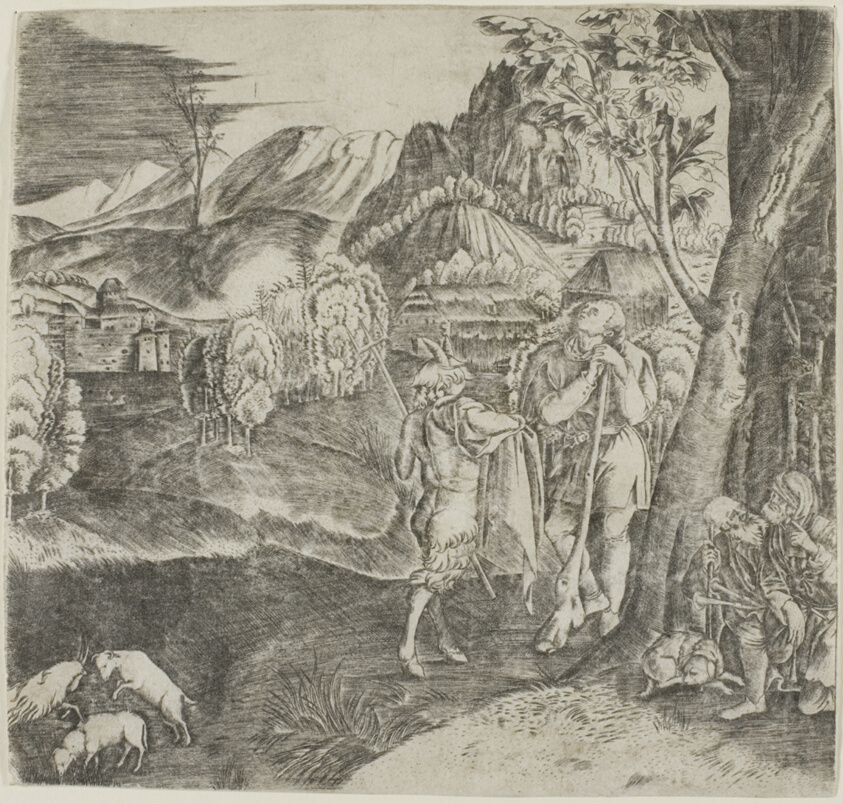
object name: Print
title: Shepherds and Satyr in a Landscape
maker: Agostino dei Musi (Italian, c. 1490-after 1536)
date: after 1504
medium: Engraving in black on ivory paper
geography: Italy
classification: engraving; print; prints and drawing